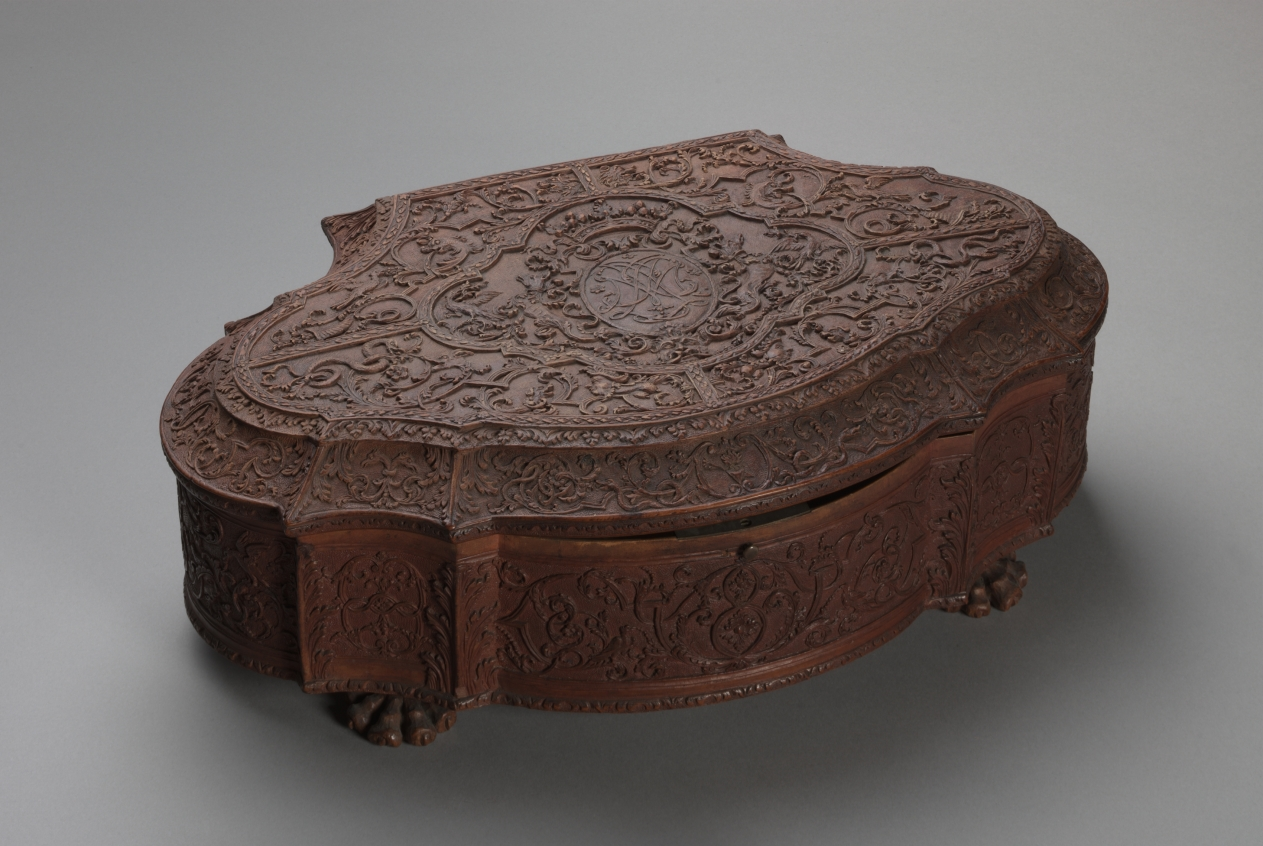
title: Box (2 of 2)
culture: France, Nancy, early 18th century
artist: Bagard (French)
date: early 1700s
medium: wood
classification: Furniture and woodwork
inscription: on top of lid, initials crowned by coronet